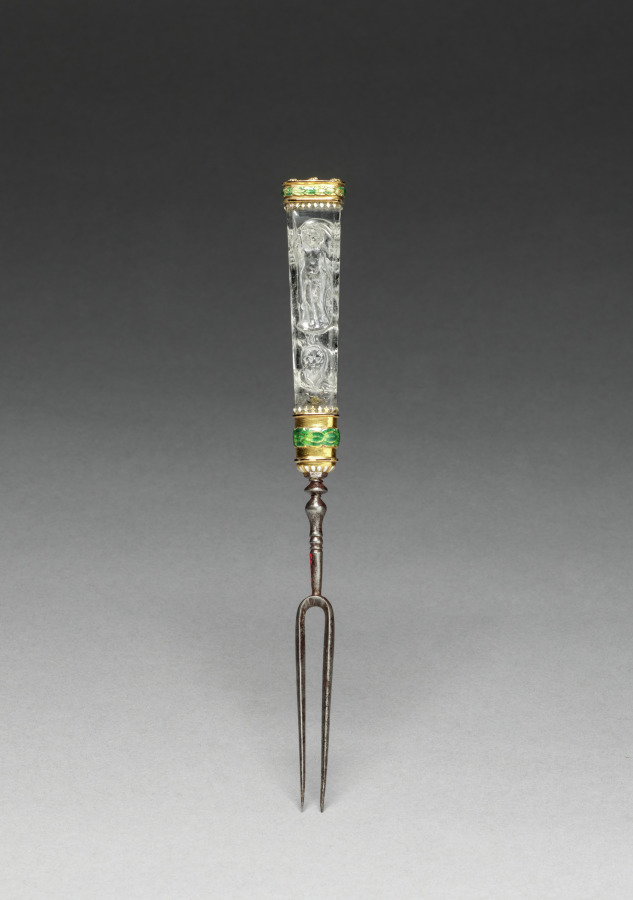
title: Knife and Fork with Sheath (Fork)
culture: Italy, Venice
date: late 1500s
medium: gold, enamel, crystal, steel, leather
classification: Enamel